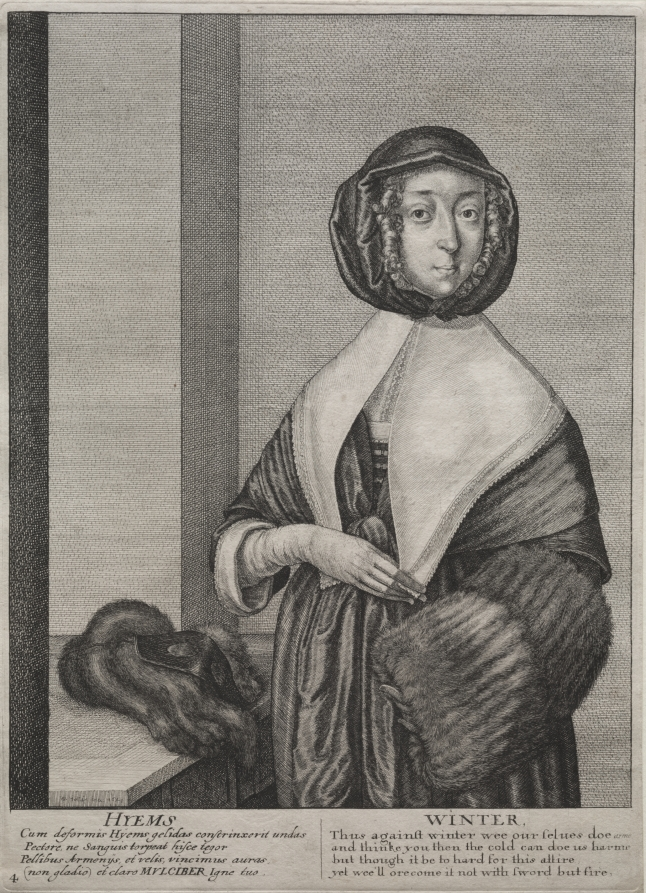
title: The Four Seasons: Winter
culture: Bohemia, 17th century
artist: Wenceslaus Hollar (Bohemian, 1607–1677)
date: 1641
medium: etching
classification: Print